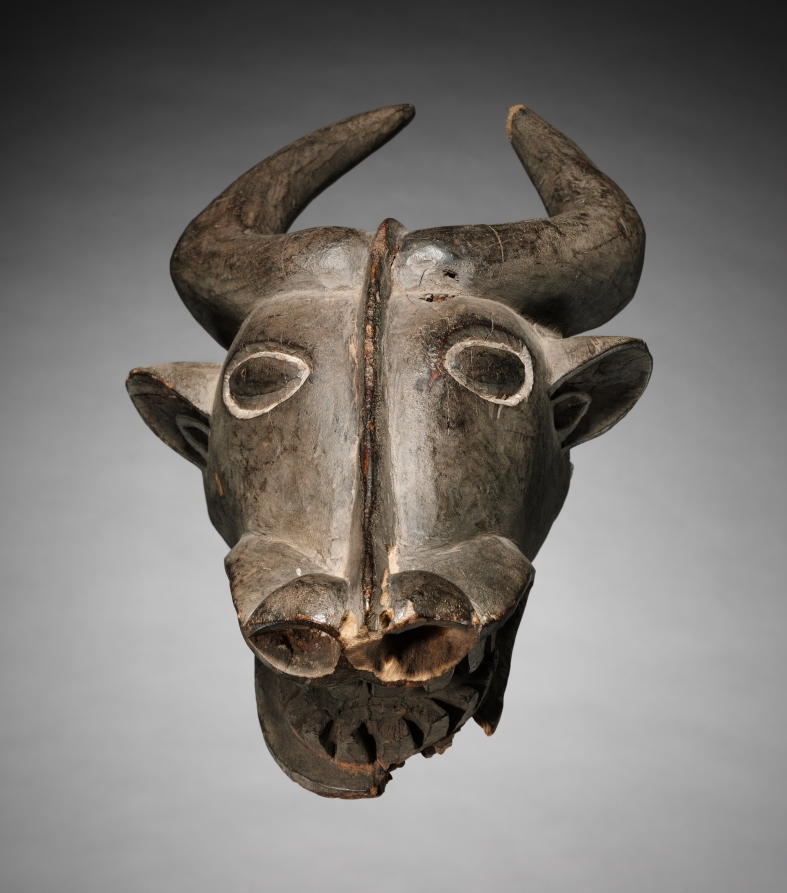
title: Headdress Mask: Buffalo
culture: Africa, Central Africa, Cameroon, Grassfields region, Bamileke-style maker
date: c. 1910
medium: Wood and colorant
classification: Mask